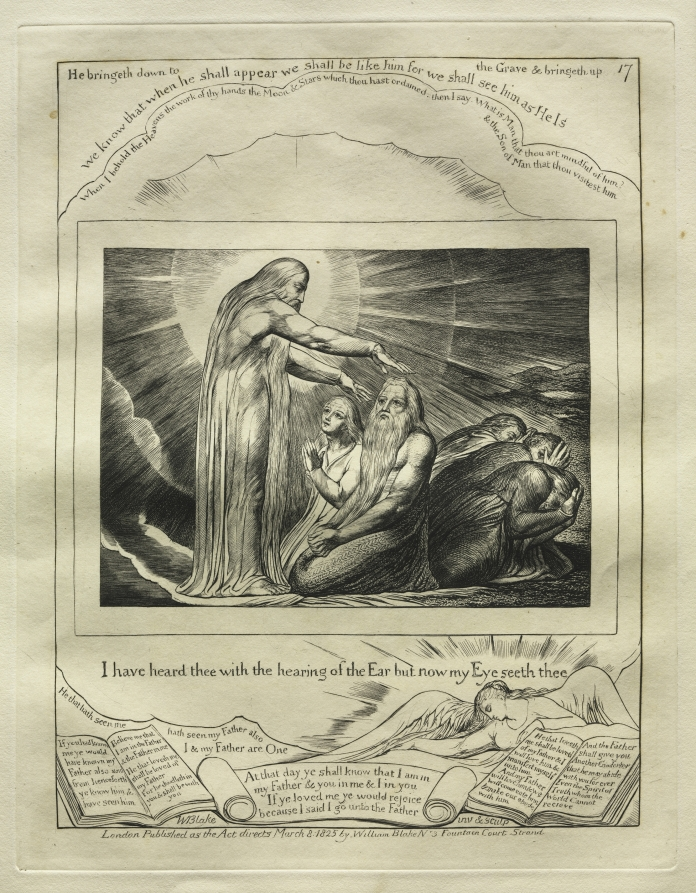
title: The Book of Job: Pl. 17, I have heard thee with the hearing of the Ear but now my Eye seeth thee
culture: England, 19th century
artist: William Blake (British, 1757–1827)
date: 1825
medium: engraving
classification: Print